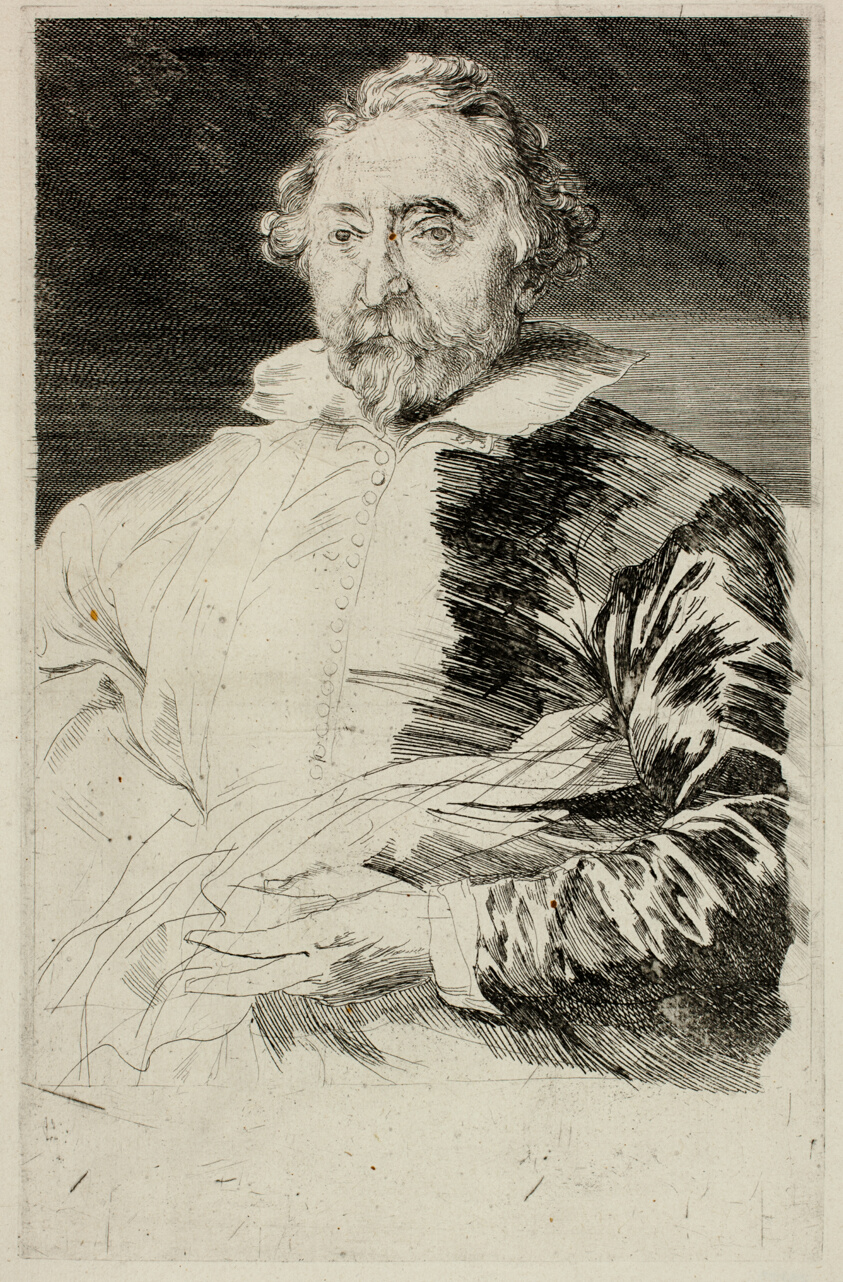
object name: Print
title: Willem de Vos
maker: Anthony van Dyck (Flemish, 1599-1641)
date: 1630/33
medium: Etching and engraving in black on ivory laid paper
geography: Flanders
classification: etching; print; prints and drawing